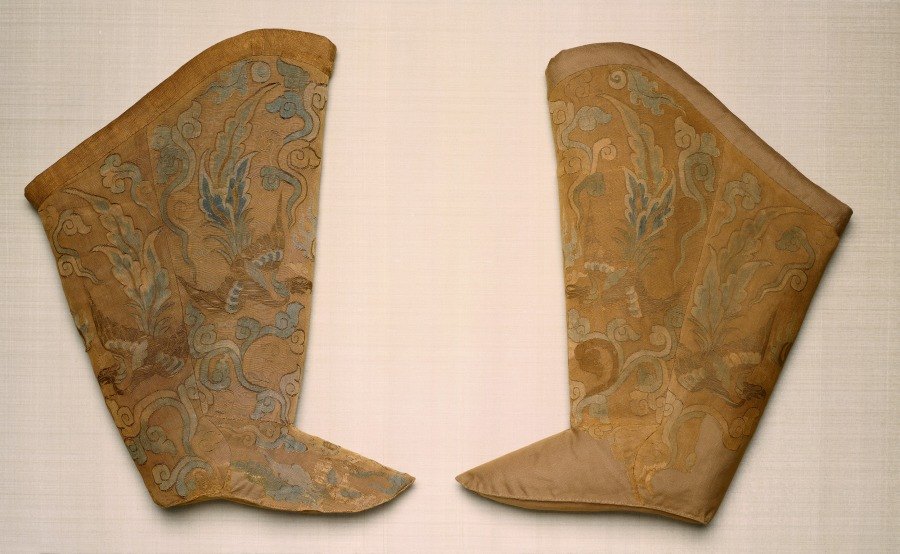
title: Pair of Boots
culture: Northern China, Liao dynasty (907-1125)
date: 907–1125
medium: Silk: tapestry weave; two kinds of metal threads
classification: Textile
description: This magnificent pair of boots, made of finely woven silk tapestry (kesi), features two phoenixes in flight chasing a flaming pearl. Although the bright colors of the fabric have become muted from being buried in a tomb and the gold threads are partly disintegrated, the once lavish use of gold and the Chinese-inspired phoenix motif suggest that the boots were made for a member of the Liao imperial family, probably a woman. At the time the boots were made in the Khitan-occupied territory in northern China, footbinding was introduced among upper-class women in southern China. The high value the Khitan people accorded to boots relates to their mobile, seminomadic lifestyle.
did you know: The boots have a complete padding and lining, but the soles do not show signs of being worn.